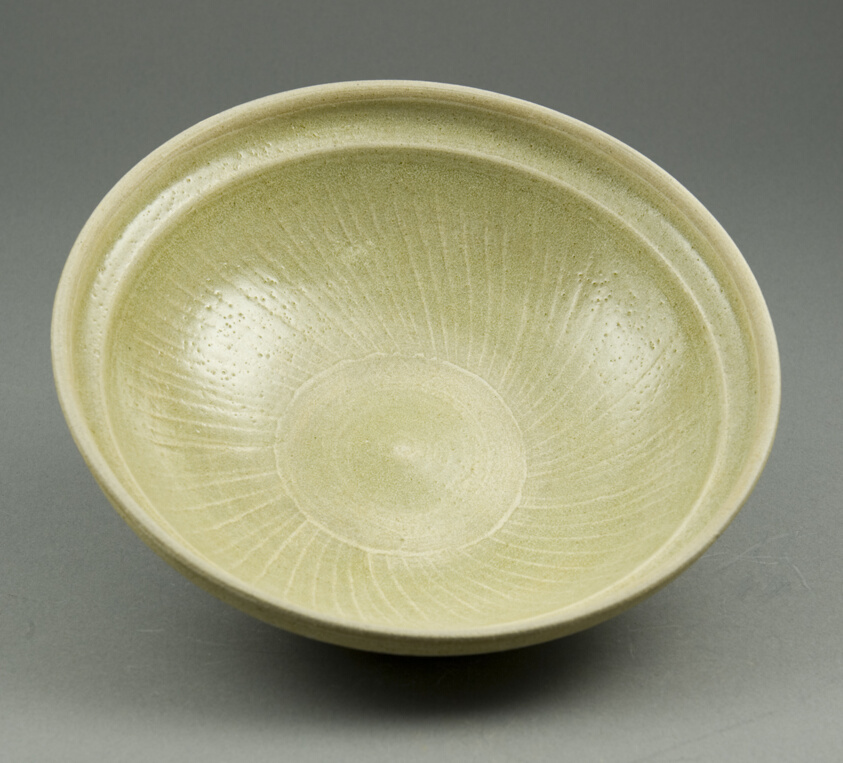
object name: Decorative Arts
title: Dish with Incised Fan Pattern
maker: Thailand, Chiang Mai Province, Sankampaeng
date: 14th century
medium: Stoneware with celadon glaze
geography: Chiang Mai province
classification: stoneware; decorative arts